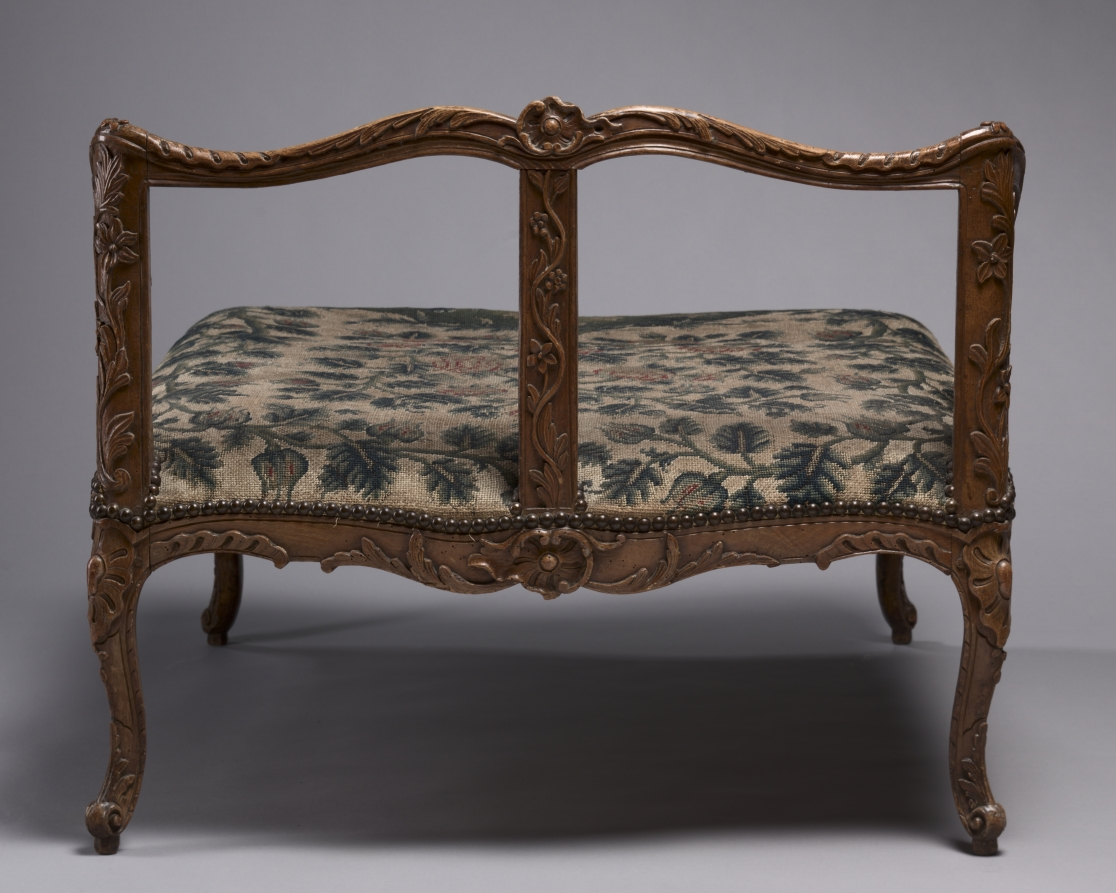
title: Chaise Lounge (Stool)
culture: France, style of Louis XV, 20th century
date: c. 1890–1940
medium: carved wood frame upholstered in needlework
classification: Furniture and woodwork